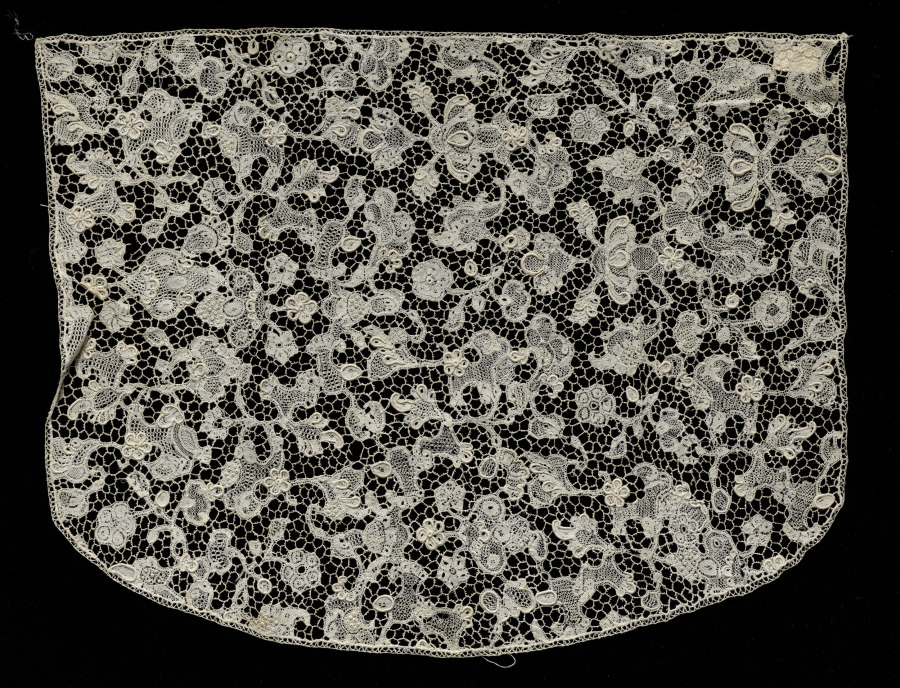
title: Lace Cap Top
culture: France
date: 1700–1740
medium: Linen: needle lace (Point de France)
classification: Lace